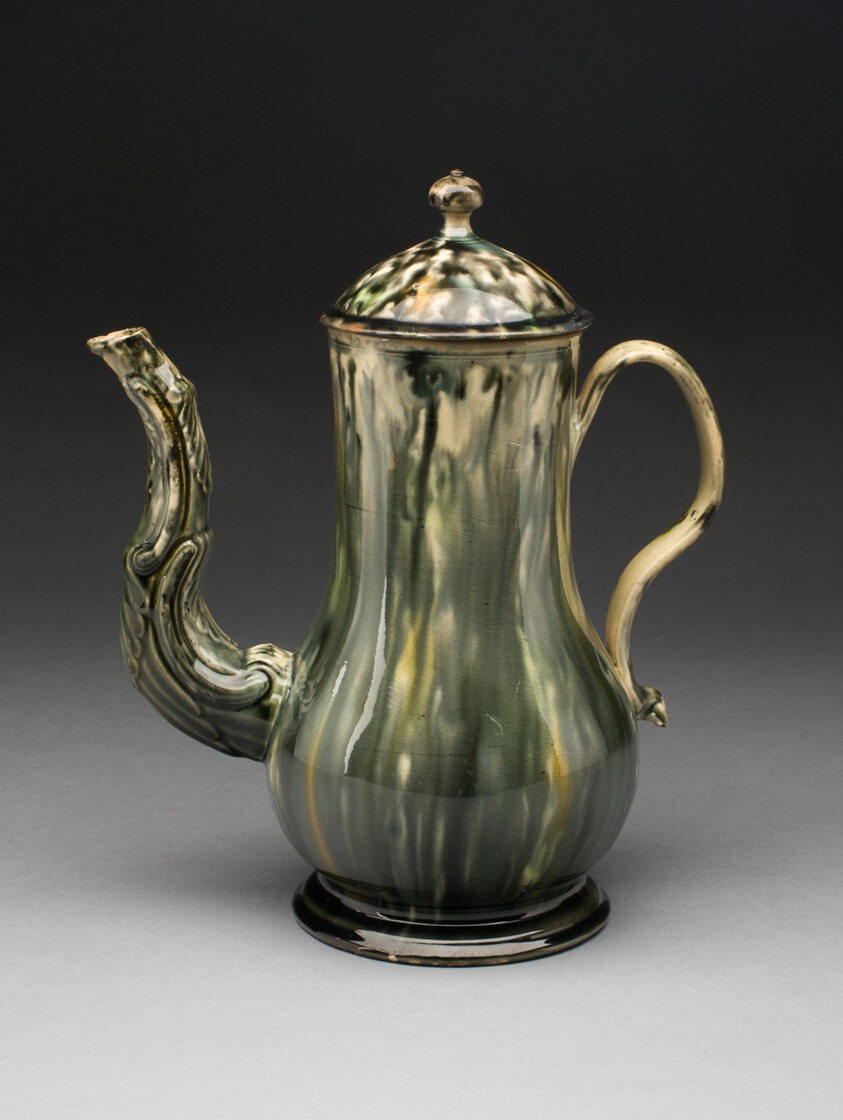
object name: Ceramics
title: Coffee Pot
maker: England, Staffordshire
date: 1760/70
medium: Lead-glazed earthenware (creamware)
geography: Staffordshire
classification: earthenware; european decorative arts; ceramics; creamware; lead-glazed earthenware